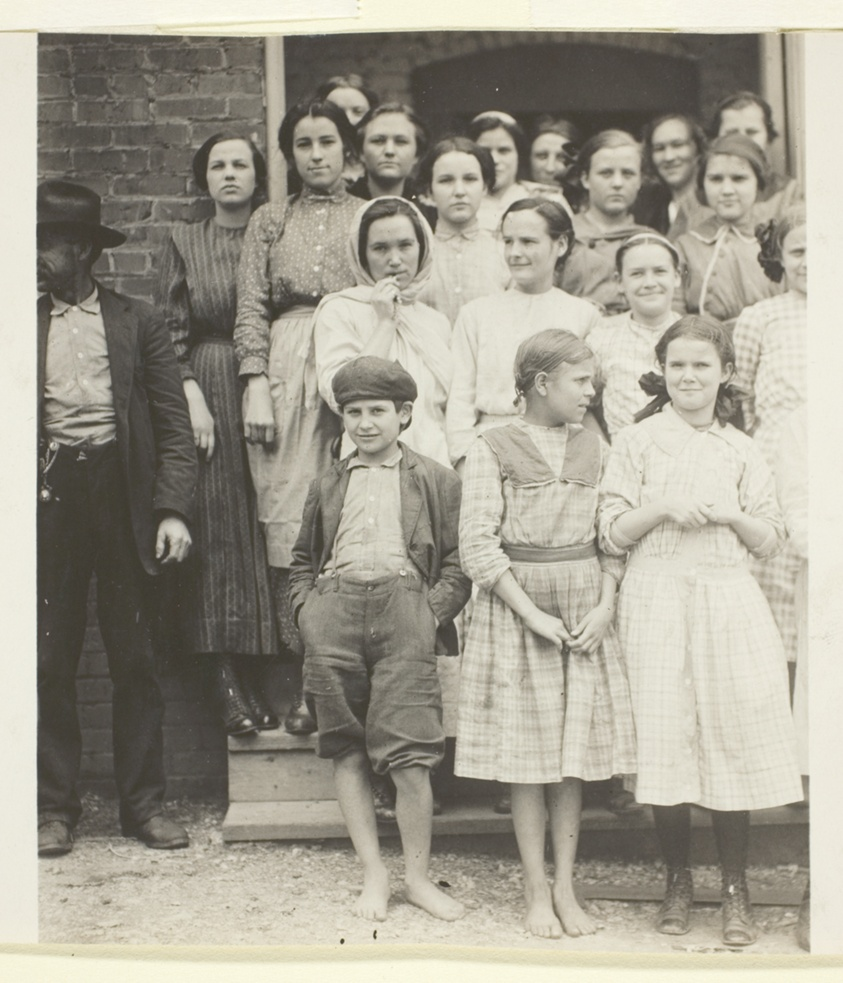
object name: Photograph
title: All are Workers in Walker County Hosiery Mills, Lafayette, Georgia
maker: Lewis Wickes Hine (American, 1874–1940)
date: 1913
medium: Gelatin silver print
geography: United States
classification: gelatin silver (developing-out-paper) pr; photographic process; photography; photograph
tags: documentary